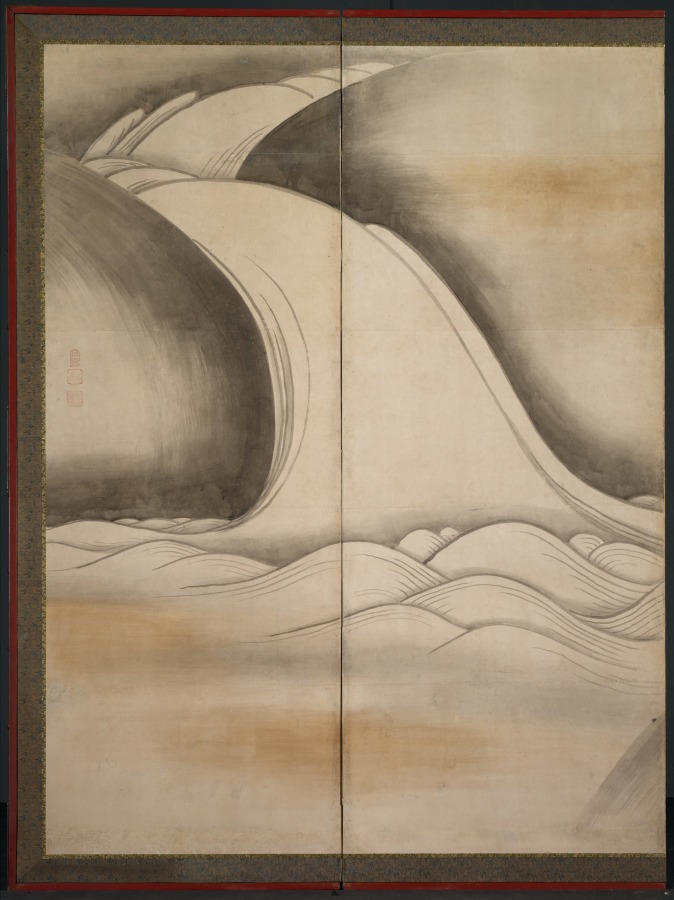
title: Tiger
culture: Japan, Edo period (1615–1868)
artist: attributed to Soga Nichokuan (Japanese)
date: early to mid-1600s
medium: six-panel folding screen; ink, slight color, gold, and silver on paper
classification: Painting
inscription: Signed: Soga Chokuan II (Soga Chokuan ni). Sealed: Hoin (right), Soga Chokuan Hoin (three seals at left) Edo period (1615-1868)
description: A tiger looks upon a waterfall as it prowls out of a bamboo grove on this screen, and a dragon dives through clouds on the right. Tiger and dragon are traditional symbols of the balancing forces in the world, yin (the feminine aspect) and yang (the masculine aspect). This painting has a signature and seals, identifying it as a work by Soga Nichokuan, a painter thought to be from Sakai (near Osaka), and known primarily for his representations of hawk-eagles (kumataka).